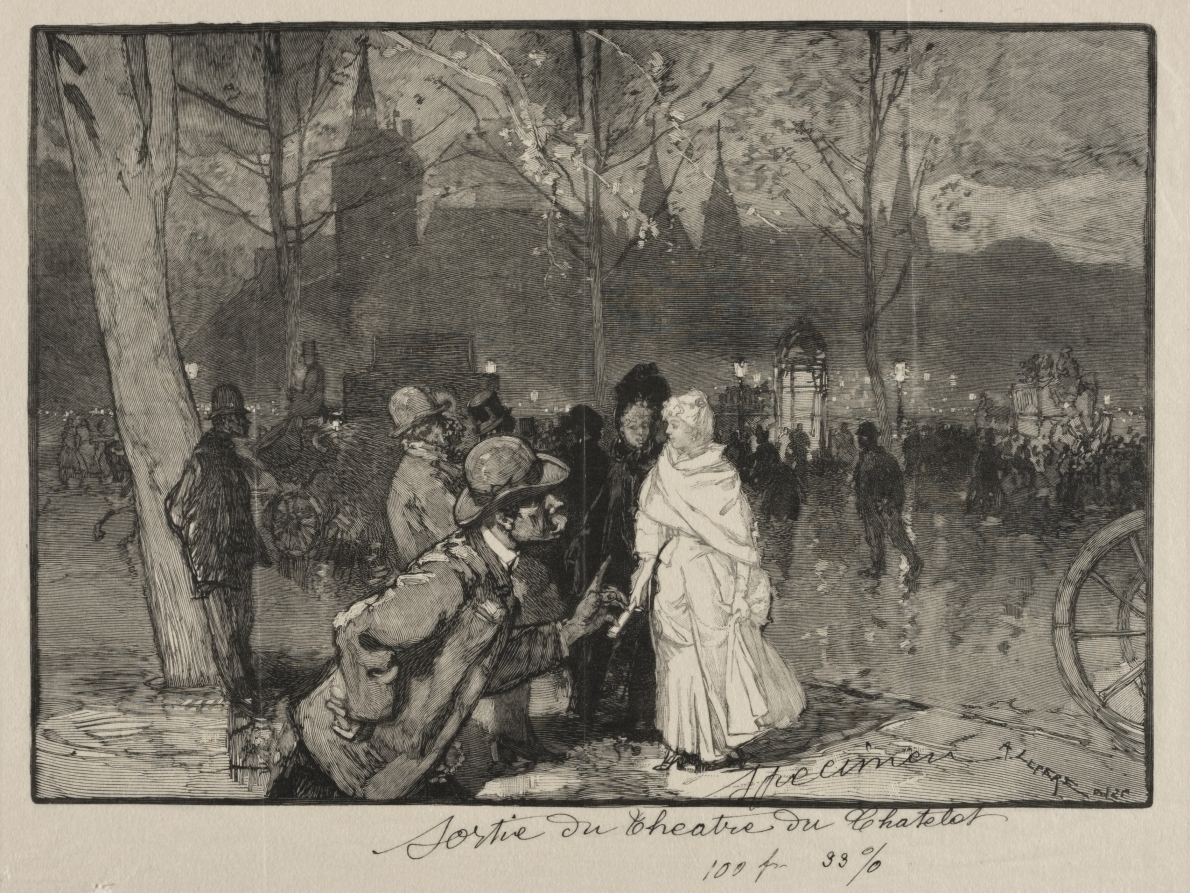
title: Sortie du Théâtre du Chatelet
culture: France, 19th-20th century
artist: Auguste Louis Lepère (French, 1849–1918)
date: 1888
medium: wood engraving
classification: Print